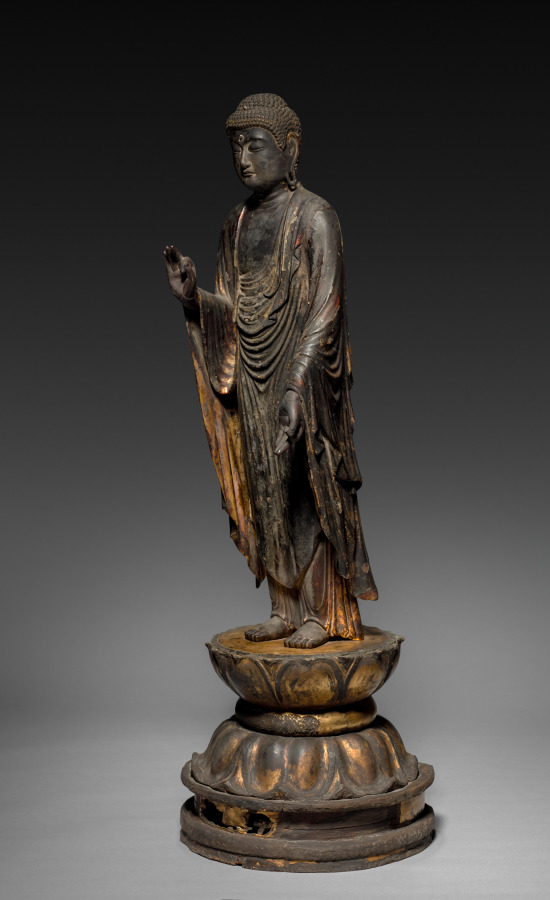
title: Amida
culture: Japan, Kamakura period (1185–1333)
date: 1200s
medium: Wood with lacquer and gilding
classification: Sculpture